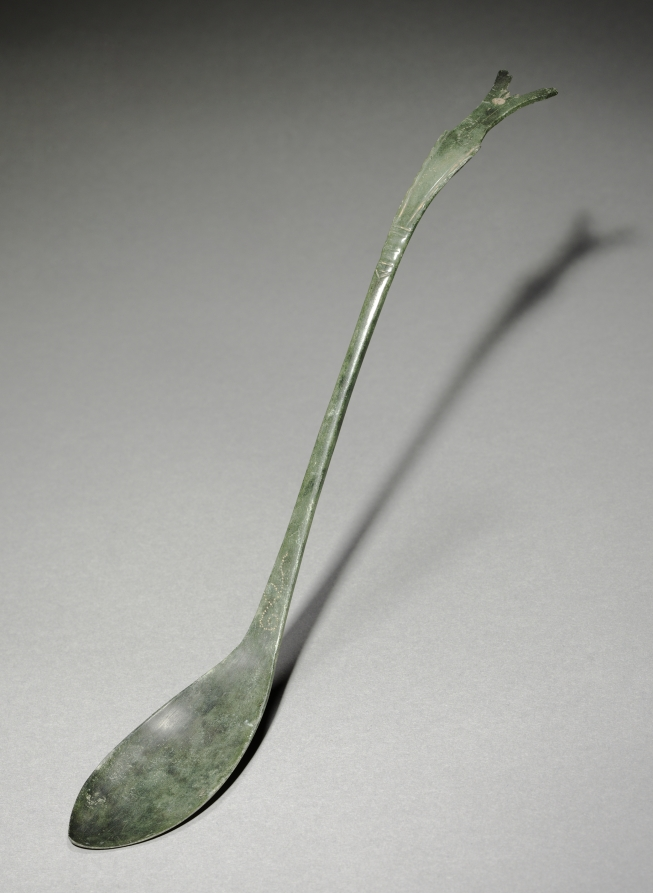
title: Spoon with Fish-Tail Design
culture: Korea, Goryeo dynasty (918–1392)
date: 918–1392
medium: bronze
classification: Metalwork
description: Many of Goryeo period spoons like this one feature a curved handle that splits into a jagged fishtail design. This fishtail design is not unique to Korea; it was also widely used in the area under the rule of two non-Han Chinese states: Liao (907–1125) and Jin (1115–1234). These seemingly ordinary objects testify to exciting material interactions between the Goryeo dynasty and non-Han Chinese northern states, which were often omitted from the official records.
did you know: Bronze spoons are the most common burial item. Scholars have proposed that toward the end of the 14th century, Koreans enjoyed meat-based soups more than any other dishes, explaining why spoons became common household items as well as burial goods.